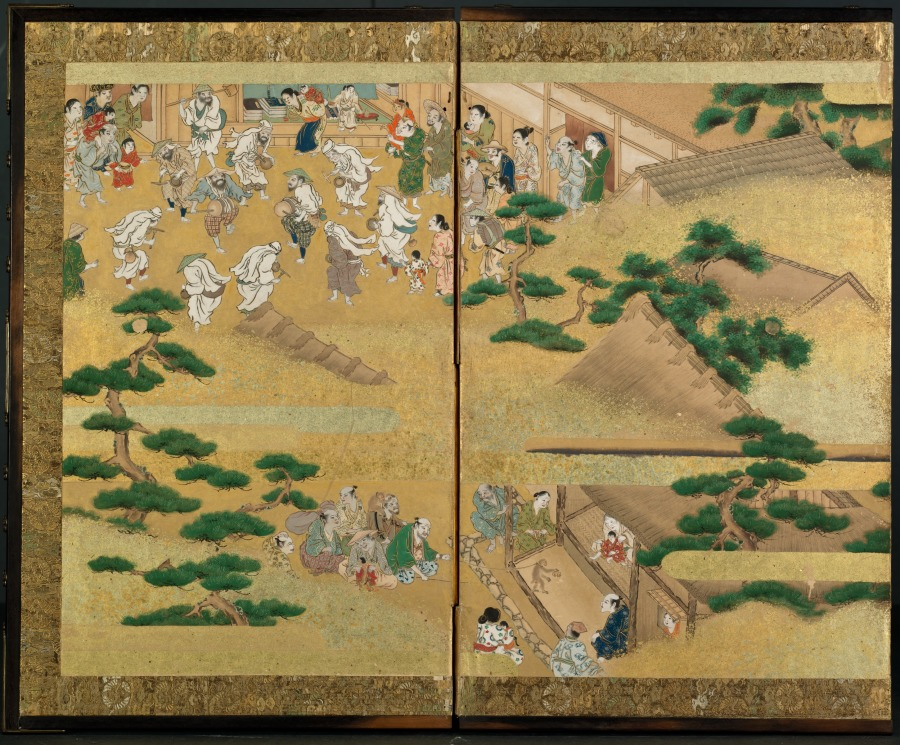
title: Festival Scenes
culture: Japan, Edo period (1615–1868)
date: 1600s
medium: one of a pair of six-panel folding screens; ink, color, gold, and gold leaf on paper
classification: Painting